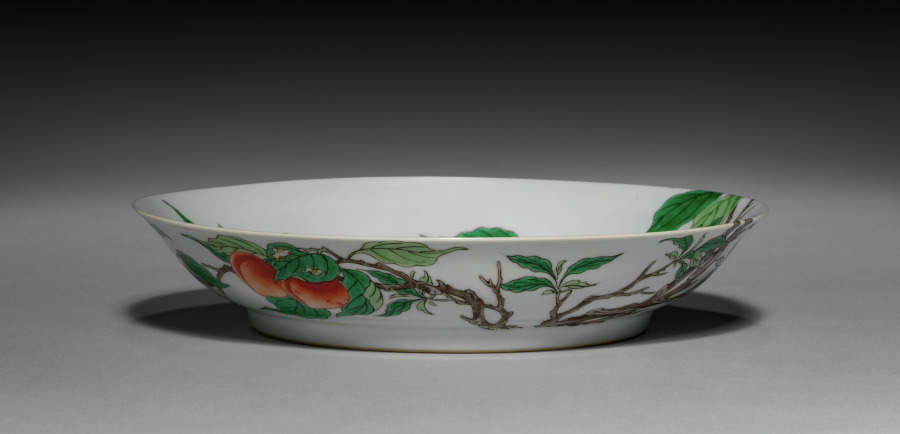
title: Dish with Bird on Fruit Tree Branch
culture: China, Jiangxi province, Jingdezhen kilns, Qing dynasty (1644–1911), Kangxi mark and reign (1662–1722)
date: 1662–1722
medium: Porcelain with famille-verte overglaze enamel decoration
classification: Ceramic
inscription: 大清康熙年制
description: Porcelain decorators in the Qing dynasty broadened the palette of naturalistic colors available to their predecessors with the technique of overglaze painting. They carefully painted designs in low-fire, lead-based glazes on top of undecorated glazed porcelains that had already been fired to the required 1200 degrees Celsius. After the pieces were painted, they were fired a second time to set and fix the glazes to the surface. With sharp images in translucent colors on thin white bodies, porcelains such as these mark the final technical and aesthetic accomplishment of the Chinese ceramic tradition.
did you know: This dish is related to the set created for the Kangxi emperor's 60th birthday.